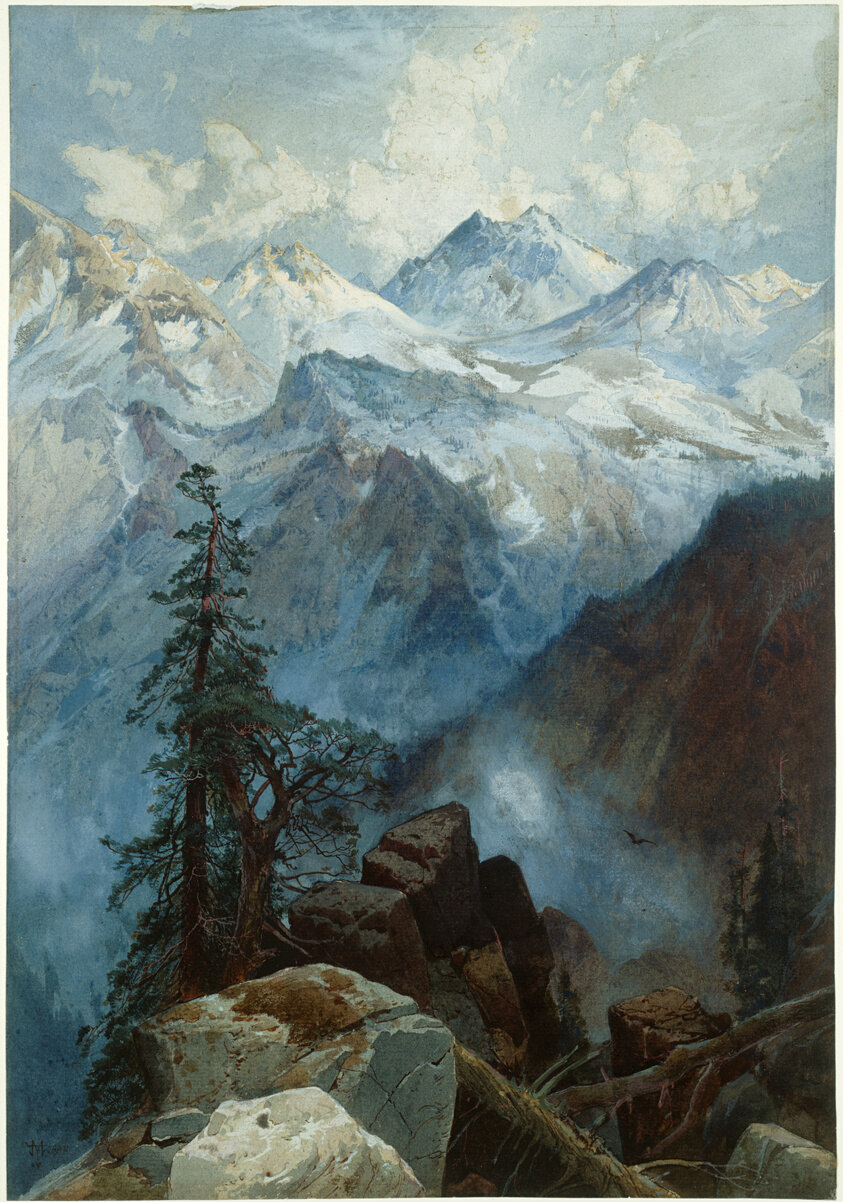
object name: Drawing and Watercolor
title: Summit of the Sierras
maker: Thomas Moran (American, born England, 1837-1926)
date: 1872/75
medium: Gouache over graphite, on cream laid paper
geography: United States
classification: gouache; drawings (visual works); prints and drawing